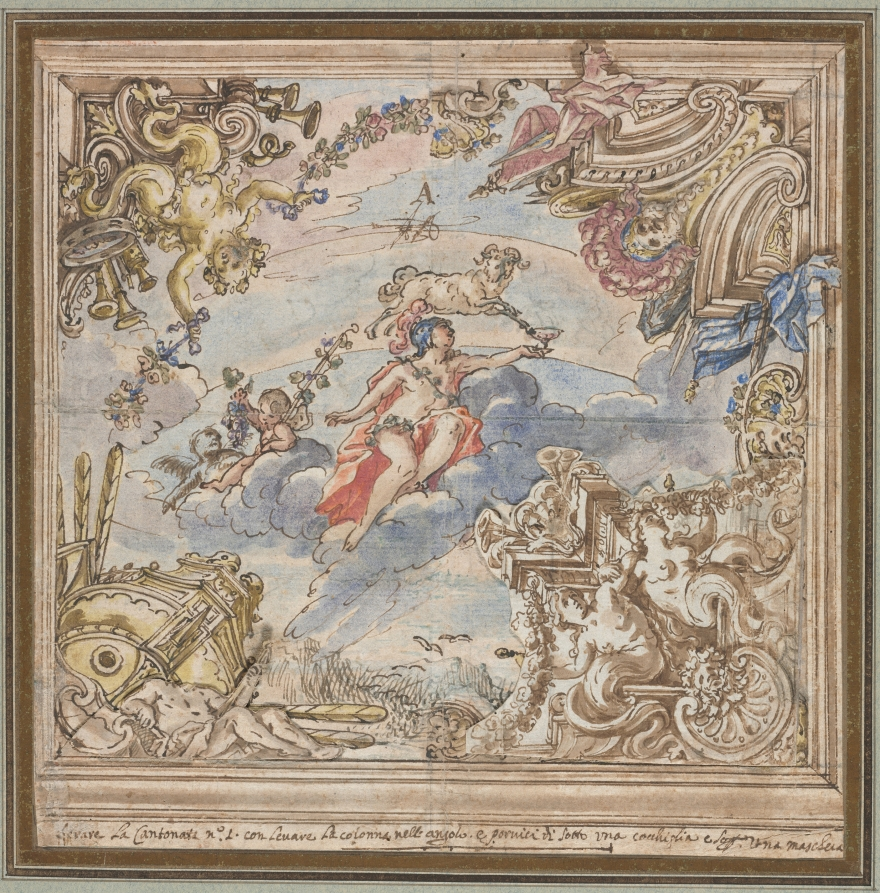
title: Design for a Ceiling: Mars and Aries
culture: Italy, 18th century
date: 1700s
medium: pen and brown ink and brush and brown wash and watercolor, with gouache, over traces of graphite; framing lines in brown ink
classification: Drawing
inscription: by artist, upper center, in brown ink: A. / [illegible]A ; by artist?, center right, in brown ink: N. I. ; by artist, across bottom, in brown ink: Levare La Cantonata N°. L. con Levare La colonna nell' angolo. e [pornici?] di sotto una conchiglia e So[tto?] Una maschera ; RECTO OF SEPARATELY APPLIED PIECE OF PAPER (lower right), in brown ink: N [O?]. ; VERSO OF SEPARATELY APPLIED PIECE OF PAPER (lower right), in graphite: nº 2343 / C [erased] c. an ; VERSO OF SECONDARY SUPPORT, lower left, in graphite: 971